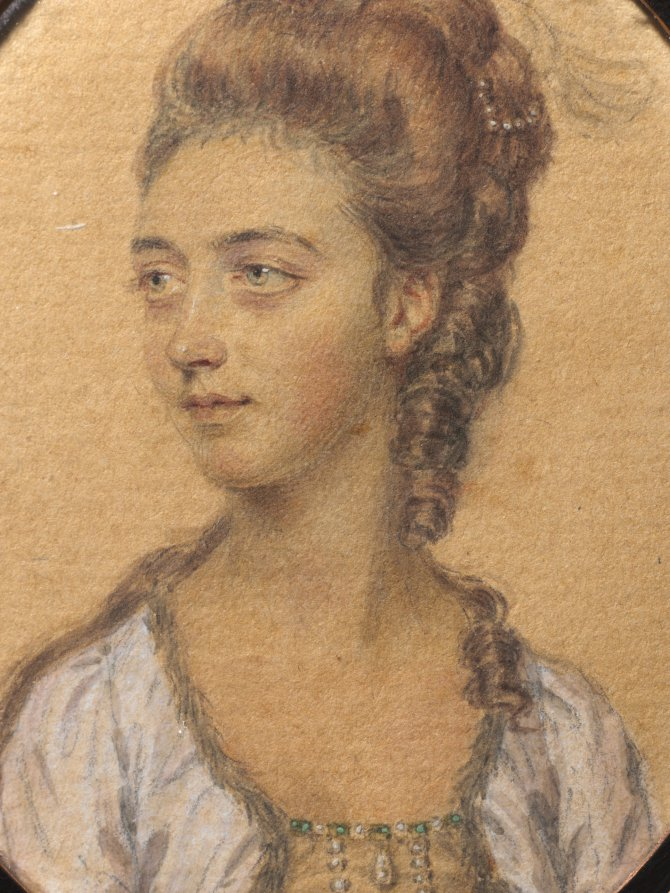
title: Portrait of Mrs. Nathaniel Bailey, née Lamack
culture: England, 18th century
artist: John I Smart (British, 1741–1811)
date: c. 1776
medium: graphite and wash on laid paper in a modern gold frame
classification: Portrait Miniature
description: Although it is impossible to say if it was always part of the artist’s process to execute a preparatory sketch prior to painting each miniature, we do know that John Smart retained many hundreds of these sketches. A group of preparatory sketches—of which this portrait is one—descended through the Smirke family after Smart’s daughter Sarah gave a sketchbook containing preparatory portrait studies to her friend Mary Smirke, sister of the celebrated Victorian architect Sydney Smirke. This book was probably broken up around 1877 when it was divided between Sydney’s daughters Mary Jemmett and Mrs. Lange, whose portions were both sold at auction in 1928. Compared to his contemporaries George Engleheart (1752–1829) and Andrew Plimer (1763–1837), whose female sitters were often painted in similar simple white gowns, Smart often lavished more attention on the costumes in his portraits of women, whose dresses incorporated colored silks, printed fabrics, and luxury trimmings like lace and fur, as seen in this portrait. Mrs. Bailey wears a violet surcoat trimmed with fur, worn over a cream-colored gown trimmed with a border of alternating pearls and blue stones and two vertical rows of pearls with one large pearl between them. Her brown hair is dressed high with ringlets descending down her neck and over her shoulders. The coiffure is ornamented with a strand of pearls and two ostrich plumes. The case is modern, and there is a brownish cast to what was originally pale, cream-colored paper—the result of light exposure changing the color over time. Smart’s preparatory sketches were compiled in books but once removed were often grouped in frames or placed in lockets such as this one. This portrait was part of the Smirke collection owned by Mary Jemmett, who sold it at Christie’s, London, on February 29, 1928. Lot 61 for this sale is described as “Mrs. Bailey, wearing pale mauve and white dress, her hair dressed high and trimmed with feathers.” The sitter, Mrs. Nathaniel Bailey (née Lamack), of Clapham, married the member of Parliament for Abingdon on March 18, 1773. Her husband was of sufficient means and is recorded in 1775 as having performed his annual distribution of £100 of bread and meat to the poor of his borough. Little else is known about this sitter. This drawing was a preparatory study for a portrait on ivory, signed and dated 1776, and measuring 2 inches high. The ivory miniature was formerly in the Ashcroft collection and was sold at Sotheby’s, London, in May 1946 to Arthur Jaffé, having previously been on loan to the Victoria and Albert Museum from 1924 to 1939. In this sale the miniature is described as “An Attractive Miniature of a Lady, by John Smart, signed and dated 1776, head and gaze three-quarters dexter, a white feather and pearls in her high piled chestnut hair, ringlets falling to the shoulders, wearing a pearl and emerald bordered low-cut cream dress and fur trimmed lavender jacket.” It most recently sold at Christie’s, London, in 2003. This portrait miniature is identical to the preparatory sketch here, both of which describe the sitter as wearing a faintly violet costume, though this color is no longer discernible in the sketch. The current location of the miniature on ivory is unknown. Edward Greene donated this and nine other preparatory studies by Smart to the Cleveland Museum of Art in 1941 and 1942. This sketch was acquired by Greene from Leopold Davis for around $260 in 1930. Although this portrait was probably part of the same sketchbook as the other nine purchased by Greene, Davis did not indicate whether or not this was indeed the case. The majority of these sketches were in a compromised condition, with fading and foxing especially prevalent.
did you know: Sketches helped John Smart work out the particulars of a portrait before commencing the miniature on ivory, and they were useful in the event that a duplicate might later be required.